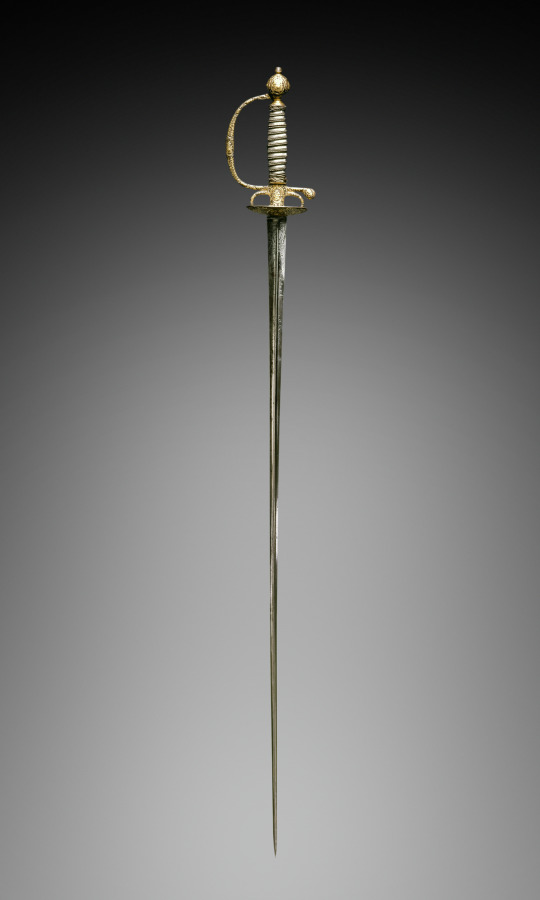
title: Smallsword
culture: France, Paris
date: c. 1730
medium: steel, blued, with gold encrusted decoration; chased and engraved; silver wire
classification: Arms and Armor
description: During the 1700s, the small-sword emerged as a light, quick weapon. Like the rapier it was carried by unarmored civilians, the noblemen of the upper classes. Over time this delicate sword became more an accessory of male attire than a weapon essential to life and death. The sword hilt, which shows even when the blade is sheathed, became the ground for elaborate decoration. These small swords thus represent the final stage in the evolution of the sword, from the edged weapons of antiquity to the elegantly refined blades of the 1700s and 1800s.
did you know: The decorative design of the hilt was often carried down onto the blade, which could be chased or etched with designs, and gilded or blued as seen here.